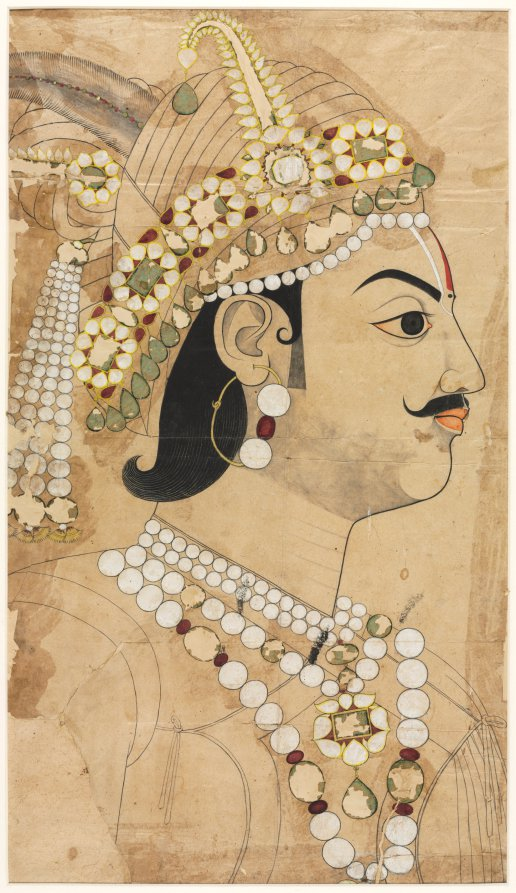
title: Portrait of Maharaja Pratap Singh (1764–1803)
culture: Northwestern India, Rajasthan, Jaipur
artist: attributed to Sahib Ram (Indian, active 1745–1803)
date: c. 1793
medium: Colored ink drawing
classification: Painting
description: Maharaja Pratap Singh came to the throne in the princely state of Jaipur in 1778 at the age of 14, about 15 years before this portrait was painted. He was a poet and patron of the arts known for commissioning the famous “Palace of the Winds” in Jaipur. At his court he maintained an atelier of about 50 painters, among whom was a Muslim master, Sah ib Ram, to whom this painting is attributed. Pratap Singh was a devotee of the Hindu god Krishna, and the mark on his forehead testifies to this affiliation. Though highly stylized, this portrait is recognizable as an image of Singh because of his profile and the distinctive curl of hair at the nape of his neck.